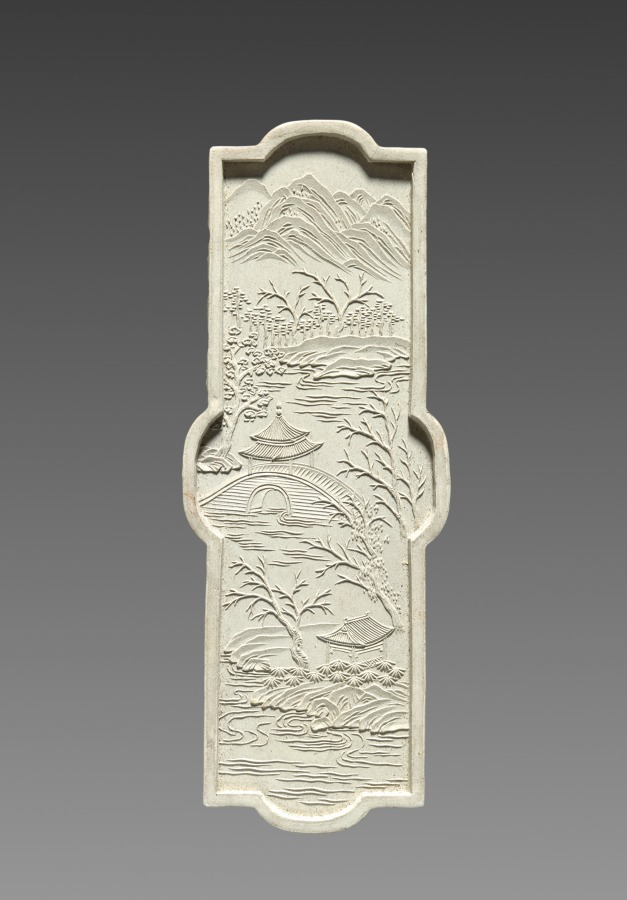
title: Ink Stick from an Imperially Commissioned Set of Ink Stick with Images and Poems of Famous West Lake Sites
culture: China, Qing dynasty (1644–1911), Qianlong reign (1736–95)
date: 1780–94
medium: Molded ink in white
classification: Miscellaneous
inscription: 乾隆年製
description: This is one of ten ink cakes of different shapes and colors stored in an exquisite lacquer box. Each is inscribed in gold with a poem by the Qianlong emperor, praising the ten famous sights of the Westlake in Hangzhou, near Shanghai. The Westlake is famous for its natural beauty; it was a favorite imperial destination and remains a tourist attraction today. Ink cakes (also called ink sticks) are dissolved with the addition of water and ground on the surface of a flat stone into liquid ink for painting and calligraphy. The precious ink cakes here, however, have never been used.